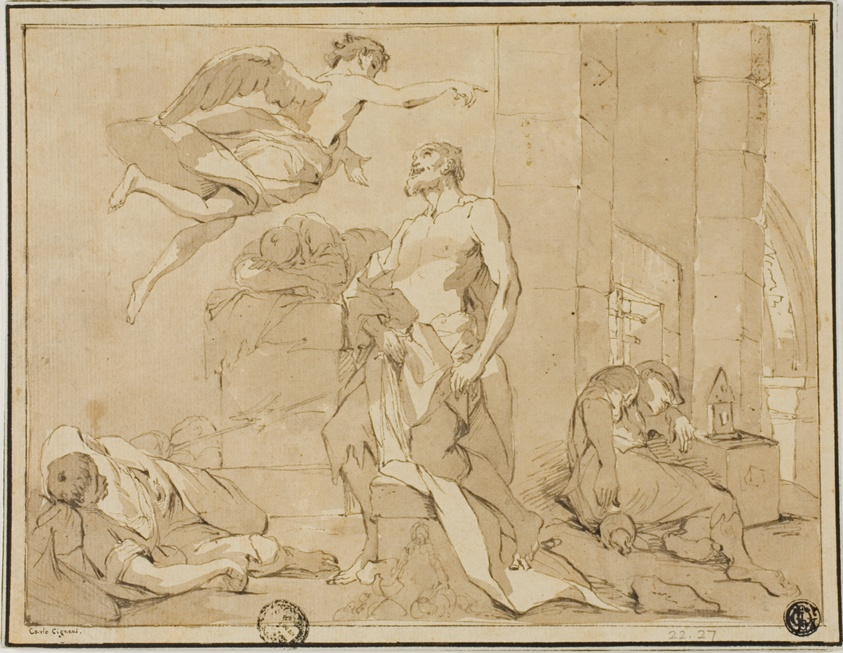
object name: Drawing and Watercolor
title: Saint Paul Rescued from Prison by an Angel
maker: Unknown Artist; Italian, 1700-1799 century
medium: Pen and brown ink, with brush and brown wash, over traces of black chalk, on cream laid paper, laid down on ivory wove paper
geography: Italy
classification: ink or chalk wash; drawings (visual works); prints and drawing